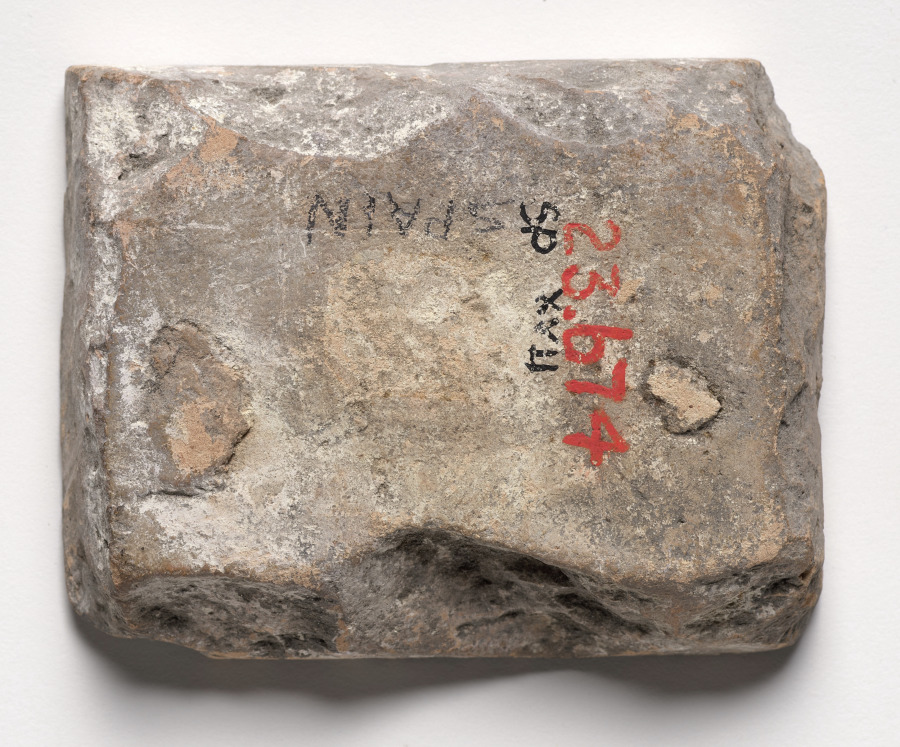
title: Wall Tile–Oval Medallion or Ornament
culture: Spain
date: c. 1600s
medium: glazed ceramic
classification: Ceramic